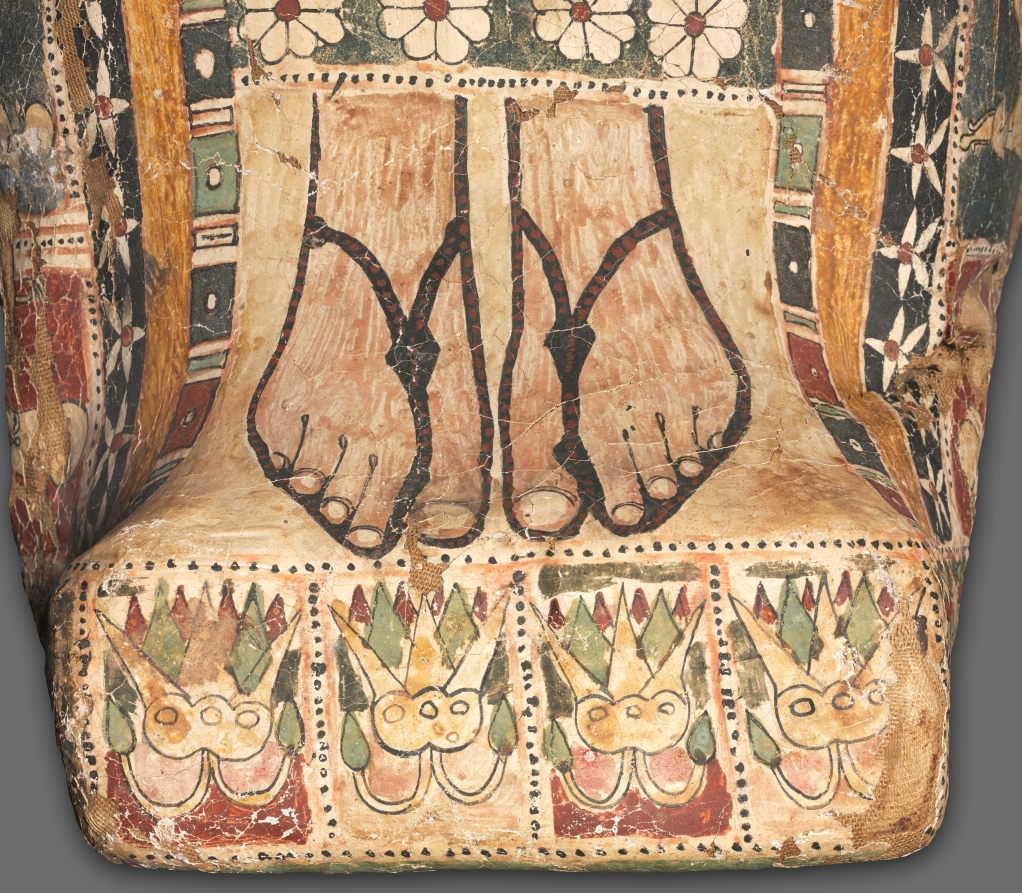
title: Cartonnage Mummy Case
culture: Egypt, Greco-Roman period (332 BCE–395 CE), Ptolemaic dynasty (305–30 BCE)–Roman empire (30 BCE–395 CE)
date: c. 50 BCE–50 CE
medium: cartonnage, painted and gilded, with glass inlays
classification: Funerary Equipment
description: This mummy case is made of cartonnage, a material similar to papier-mâché, but using layers of linen rather than paper. Cartonnage mummy cases such as these are contemporary with funerary portraits painted on wood or linen, although they present a very different appearance. The face, modeled in plaster, is bland and idealized, although the effect of the gilding and glass inlays is quite dazzling. The body is painted with traditional, age-old funerary motifs: the god Osiris, seated and mummiform; the fetish of Abydos, holy city of Osiris, flanked by standing deities (Thoth and Shu); a Horus falcon with outspread wings, and the bark of Sokar. Below these are the sandaled feet of the deceased. On the sides are rows of seated deities. On the top of the head are a winged scarab beetle flanked by Anubis jackals. On the foot are painted the soles of the deceased’s sandals, flanked by scorpions for protection.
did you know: This coffin is smaller and later in date than the other coffins in this gallery. It is made of cartonnage, which used layers of linen to create a material similar to papier-mâché. The painted portrait head displays the influence of Roman portraiture at this time and incorporates both gilding and glass inlays. Despite the fragile materials, this mummy case survived due to the very dry desert climate in which it was found.